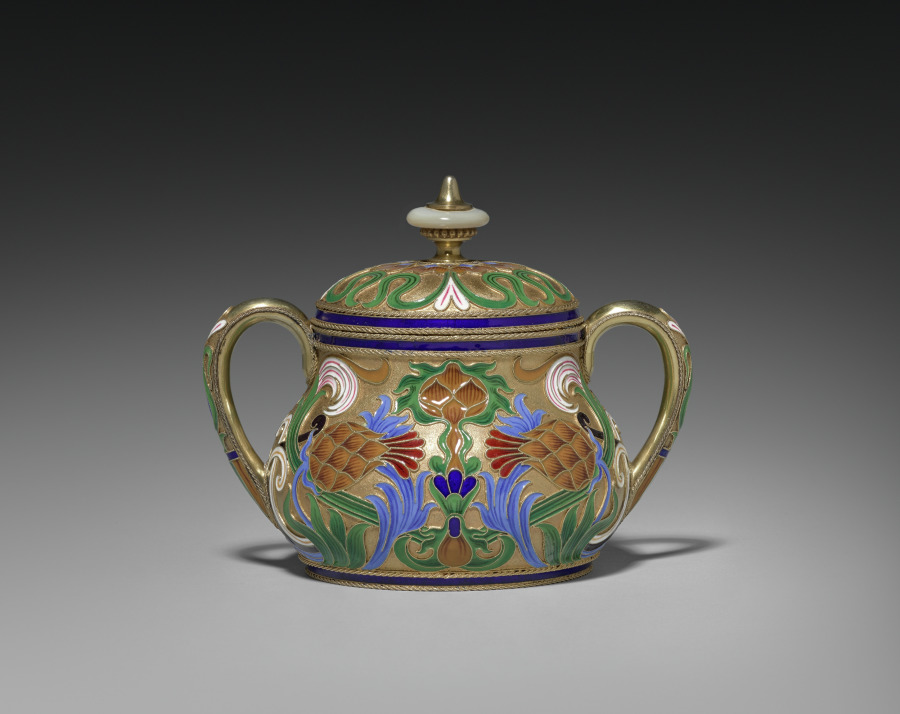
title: Covered Sugar Bowl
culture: Russia, St. Petersburg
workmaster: attributed to Feodor Ivanovich Rückert (Russian, 1840–1917)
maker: House of Fabergé (Russian, 1842–1918)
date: 1887–96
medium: silver gilt, opaque cloisonné enamel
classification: Miscellaneous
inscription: 84, St. George [assay mark for Moscow, 1882-1896]; C. Fabergé (in Cyrillic); double-headed eagle [imperial warrant]; St. George?; initials of Carl Fabergé (in Cyrillic); 10593 scratched.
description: Fabergé’s craftsmen in Moscow, especially under the watchful eye of workmaster Feodor Rückert, became known for their work in the pan-Slavic or neo-Russian style, hearkening back to 17th-century motifs of Russian folk art. Often on rather conventional shapes, Rückert and his silversmiths created an explosion of color, achieved through the historic technique of cloisonné enamel in which tiny metal lines are soldered to the surface then filled with glass powders in various colors and fired to create a high gloss finish. The result is a spectacular evocation of the 17th-century originals. Far from mere copies, however, Rückert's designs, such as this tea service, employ naturalistic or abstract motifs in a thoroughly modern adaptation of a remarkable earlier period of Russian art and decoration.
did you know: This covered sugar bowl is part of a larger tea service.